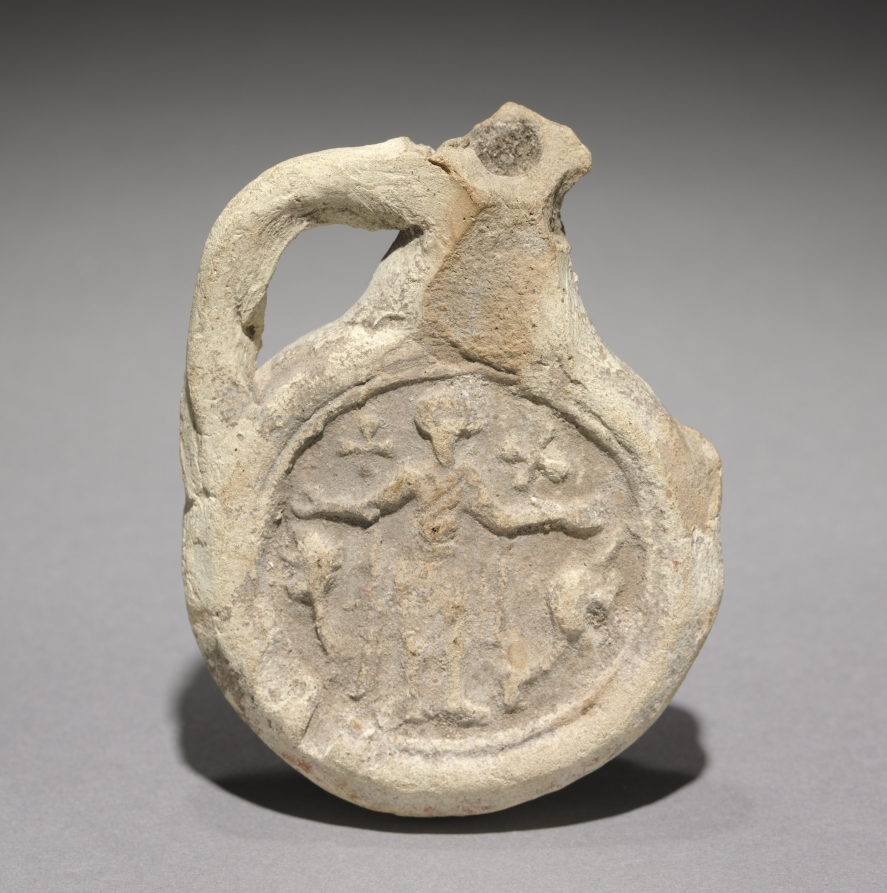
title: Pilgrim's Flask with Saint Menas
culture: Egypt, Coptic period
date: 400–600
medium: terracotta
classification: Ceramic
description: These flasks bear the image of Saint Menas, an early martyr of the Christian Church whose shrine was in the desert southwest of Alexandria in Egypt. These flasks were probably used by pilgrims to hold oil taken from the lamp that burned over this saint's tomb. Probably manufactured near the shrine, pilgrim's flasks often bear decorations hinting at their place of origin, as is the case here.